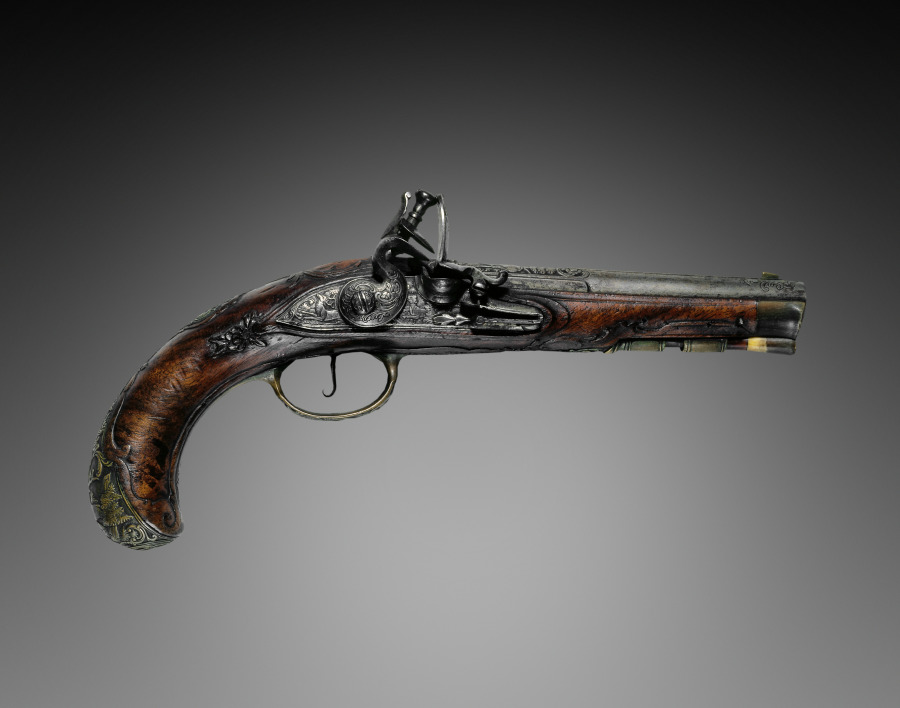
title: Flintlock Pistol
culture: Germany, Bavaria, Regensburg (?), 18th century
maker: Johann Andreas Kuchenreuter (German, 1716–1795)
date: c. 1750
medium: steel, walnut stock, brass mounts, barrel inlaid with gold, brass, and silver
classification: Arms and Armor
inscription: Barrel signed: Ioh And Kuchenruter